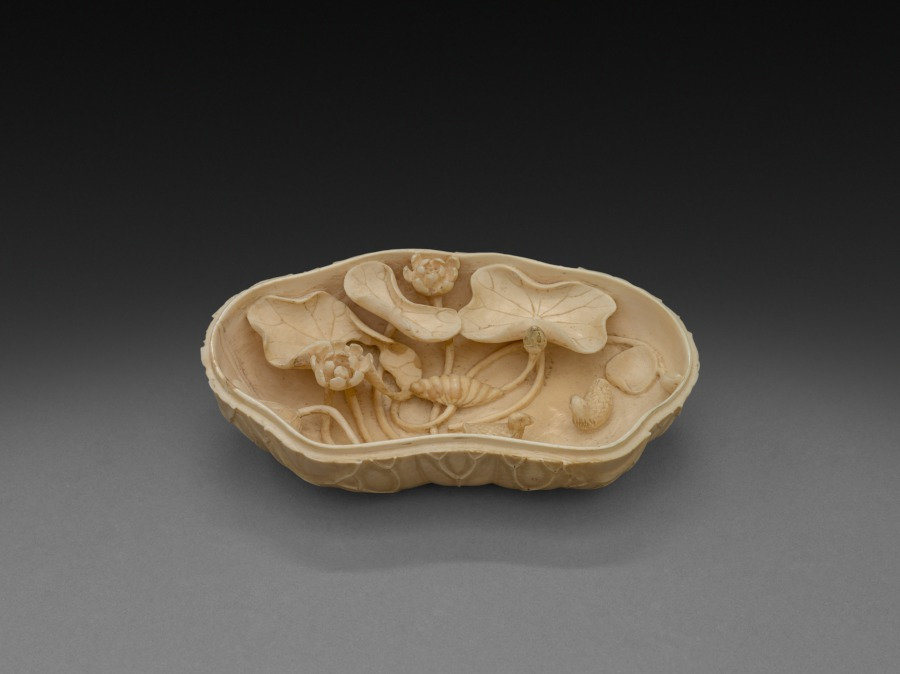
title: Box in Form of Lotus Leaf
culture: China, Qing dynasty (1644-1911)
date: 1700s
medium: ivory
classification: Ivory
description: In the Qing dynasty (1644–1911), luxury items became more affordable to larger parts of the society, including women, merchants, and literati in non-official positions. Imperial patronage and a growing urban population encouraged consumption of luxury goods and local craftmanship. This fine grained, light yellow ivory carved in the shape of a lotus leaf illustrates the superb carving skills and the creative mind of the talented artisan who sought clients on a competitive market.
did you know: Inside each box is a lotus pond and two swimming ducks carved in high relief.